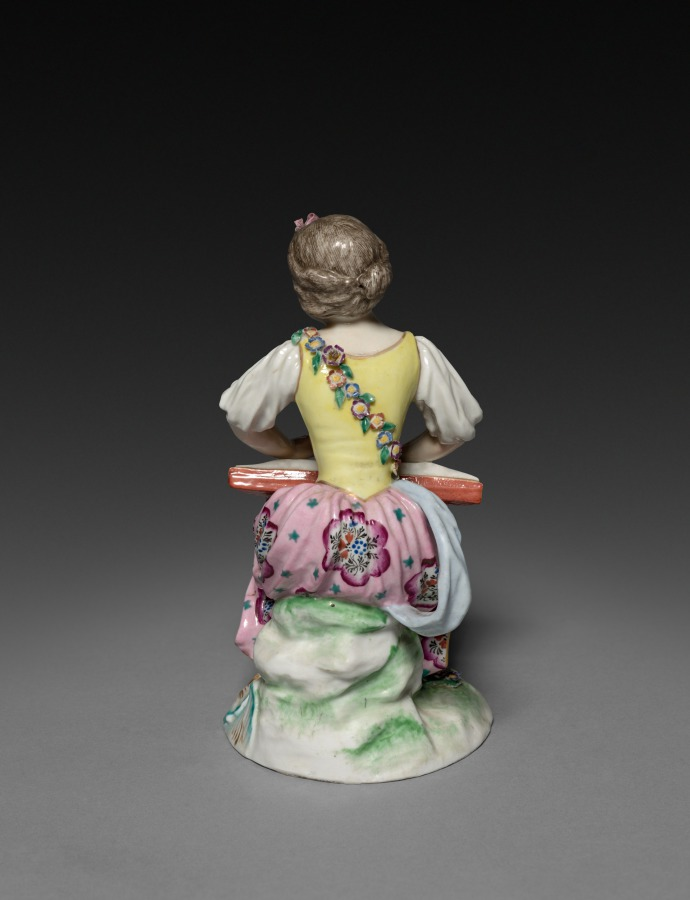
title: Girl Musician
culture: Germany, 18th century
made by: Frankenthal Porcelain Factory (German)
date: c. 1770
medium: porcelain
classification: Ceramic